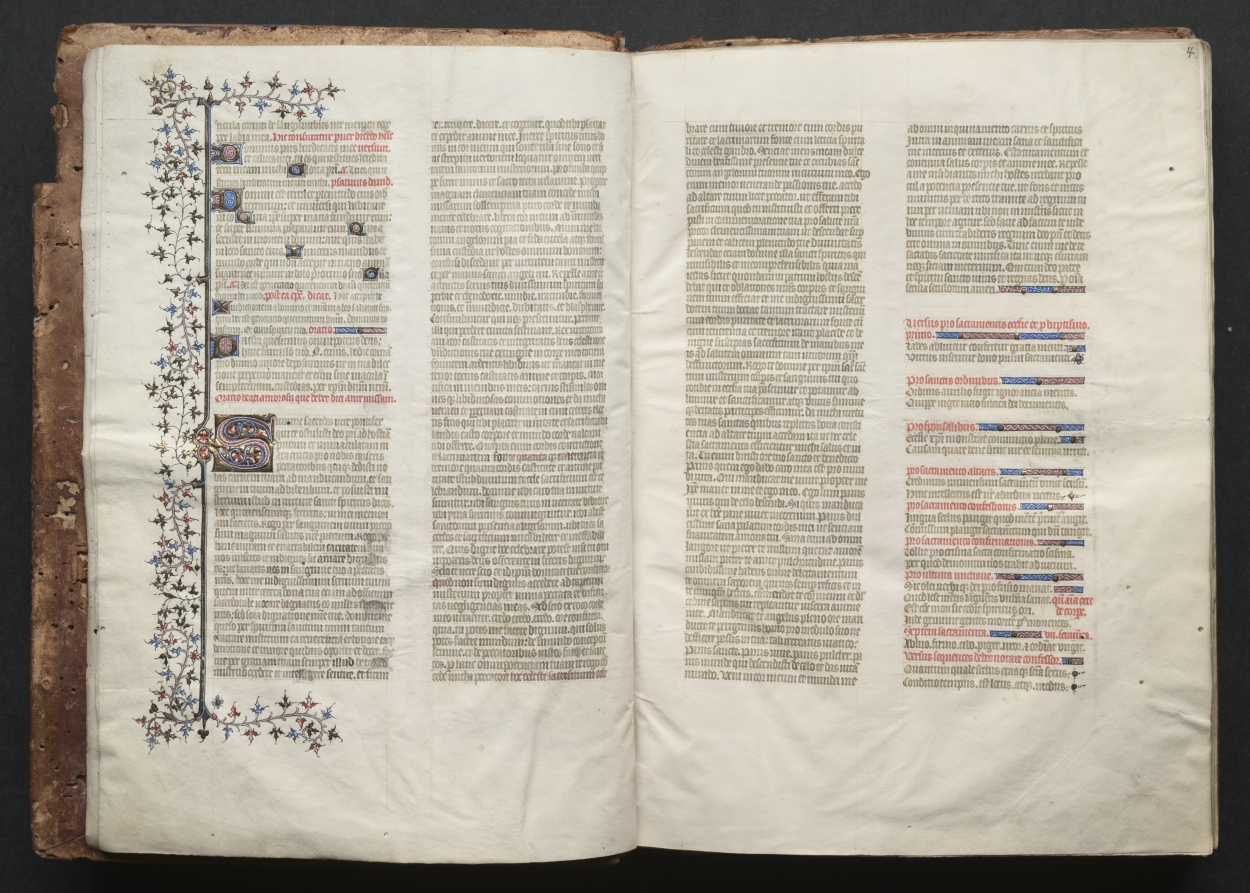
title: The Gotha Missal: Fol. 4r, Text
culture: France, Paris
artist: Master of the Boqueteaux (French)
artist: and Workshop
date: c. 1375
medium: ink, tempera, and gold on vellum; blind-tooled leather binding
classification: Bound Volume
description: The style and quality of this manuscript's decoration is typical of deluxe Parisian books made for aristocratic or royal patrons. Most of the book's decoration appears to be the work of the Master of the Boqueteaux, an artist active at the court of King Charles V (died 1380). His style was apparently shared by a number of book illuminators working in and around Paris. It is very possible that the Gotha Missal belonged to Charles V, but is not provable because the manuscript has no royal portraits and lacks a colophon. Given the book's magnificent decoration, however, it would seem that it was produced for a Valois prince, if not for the king himself. The manuscript receives its name from the German dukes of Gotha, its later owners.